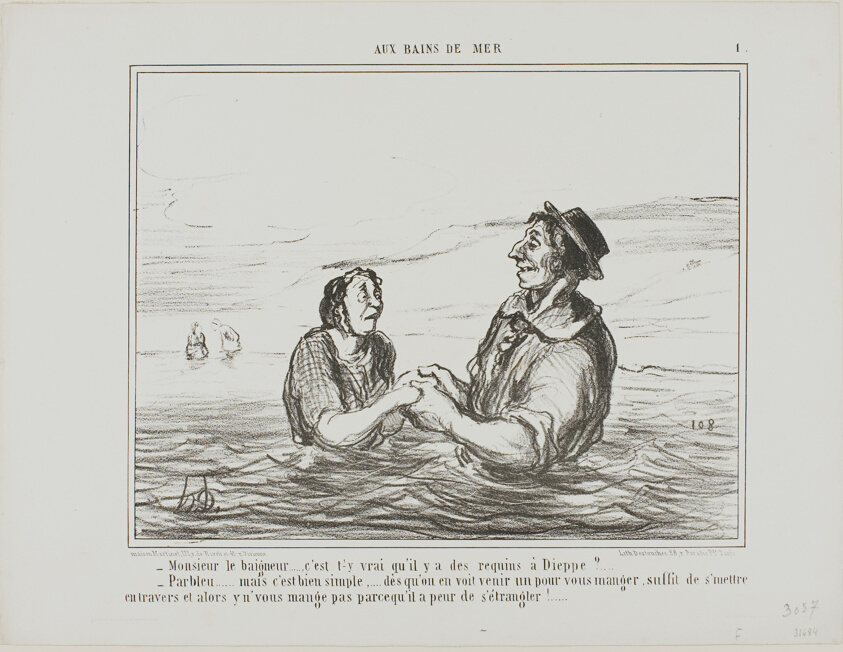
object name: Print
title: “- Mr.Lifeguard.... is it true there are sharks at Dieppe? - Of course... but it is pretty simple... as soon as you see one coming to eat you, all you have to do is lay down sideways. He won't eat you for fear of choking to death,” plate 1 from Aus Bains De Mer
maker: Honoré Victorin Daumier; French, 1808-1879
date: c. 1858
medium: Lithograph in black on white wove paper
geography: France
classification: lithograph; print; prints and drawing